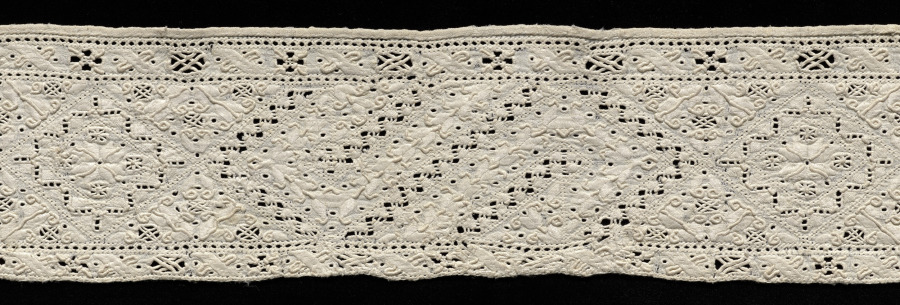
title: Lace Band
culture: Italy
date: 1500s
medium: Linen: needle lace (cutwork) and embroidery (satin stitch and curl stitch)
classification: Lace